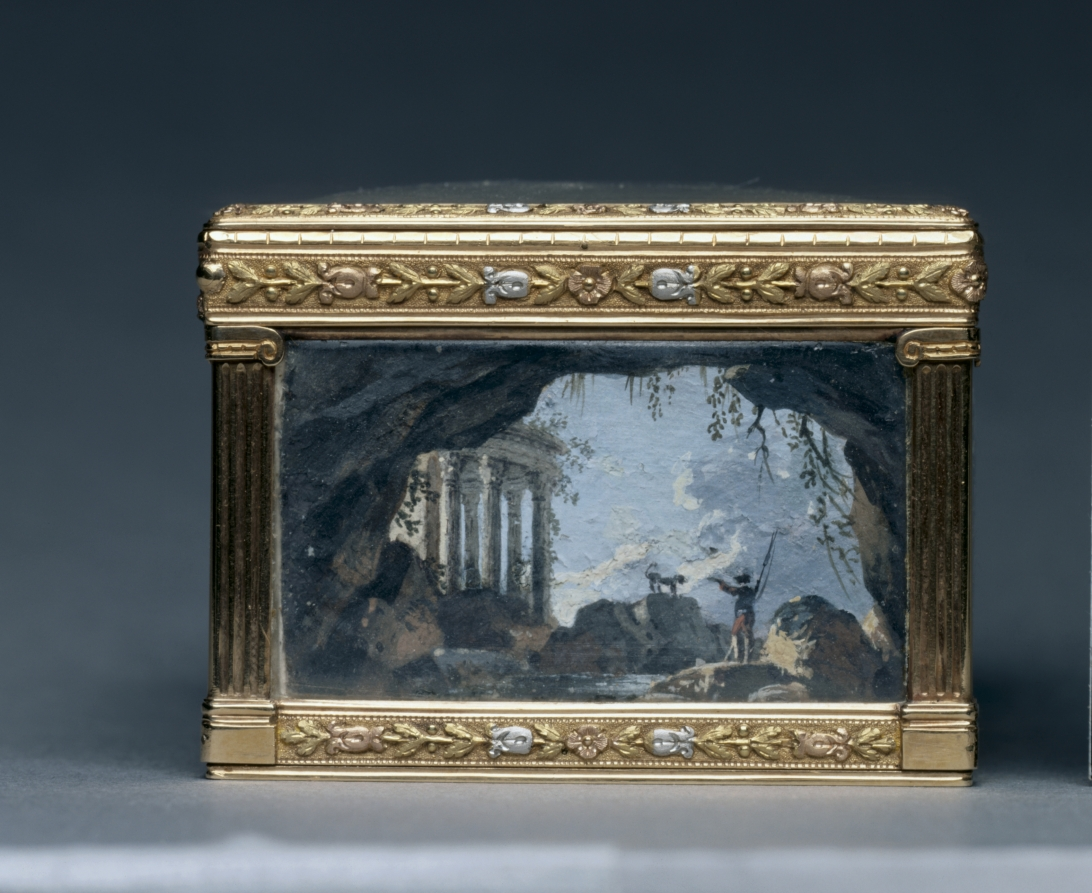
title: Rectangular Box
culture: France, 19th century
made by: Alexandre Leferre (French)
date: c. 1840–1850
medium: gouache miniatures mounted on gold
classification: Miscellaneous